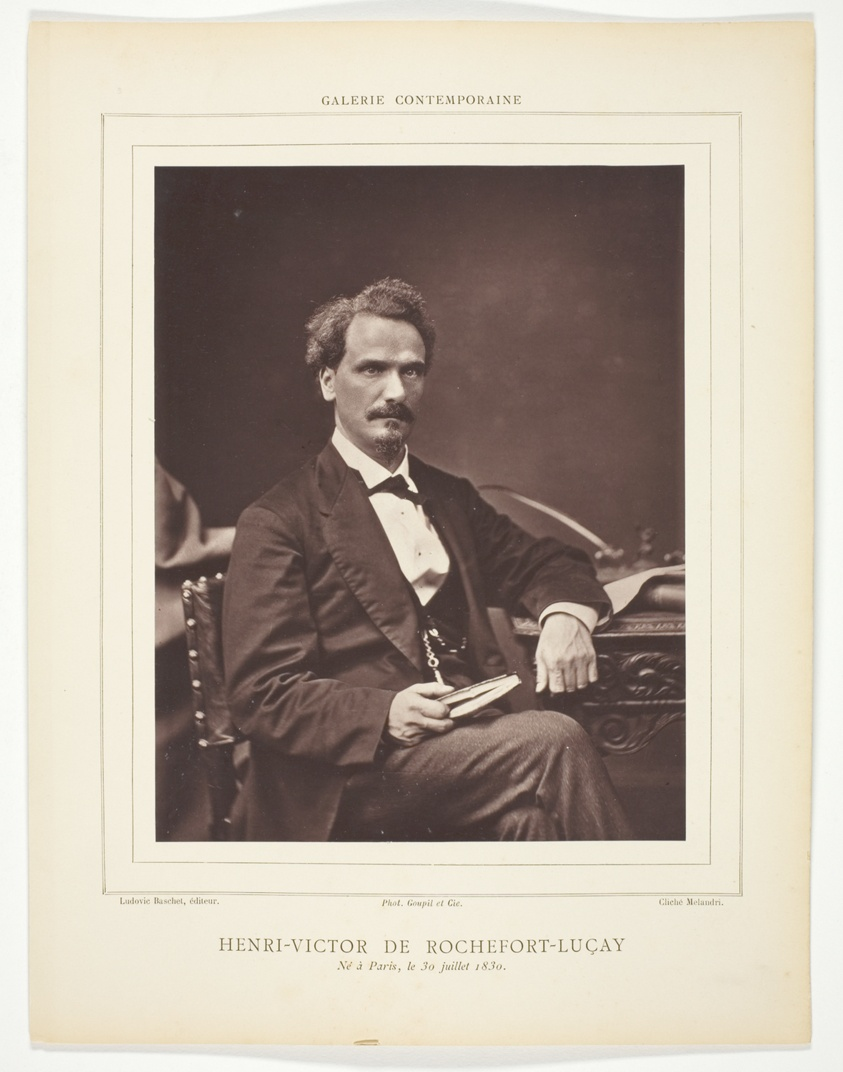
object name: Photograph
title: Henri-Victor de Rochefort-Luçay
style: 19th century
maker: Pietro Melandri (French, 1885–1976)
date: c. 1880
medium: Woodburytype, from the periodical “Galerie Contemporaine Littéraire, Artistique”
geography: France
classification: woodburytype; photomechanical process; photography; photograph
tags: Collected by Hugh Edwards, Paris, Contemporaine Littéraire